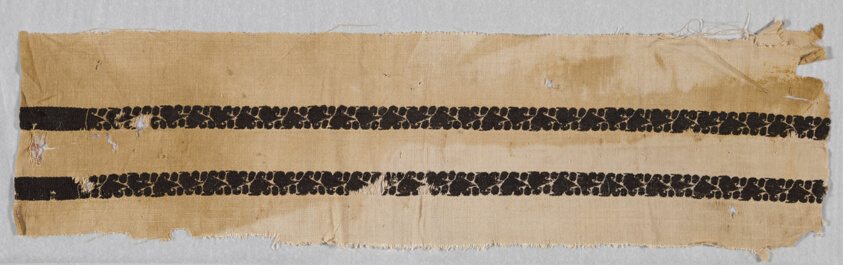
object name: Textile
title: Fragment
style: roman period (egyptian), coptic (period)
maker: Egypt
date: Roman period (30 B.C.– 641 A.D.)/Arab period (641–969)/Fatimid period (969–1171), 3rd/ 10th century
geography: Egypt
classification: textile; weaving